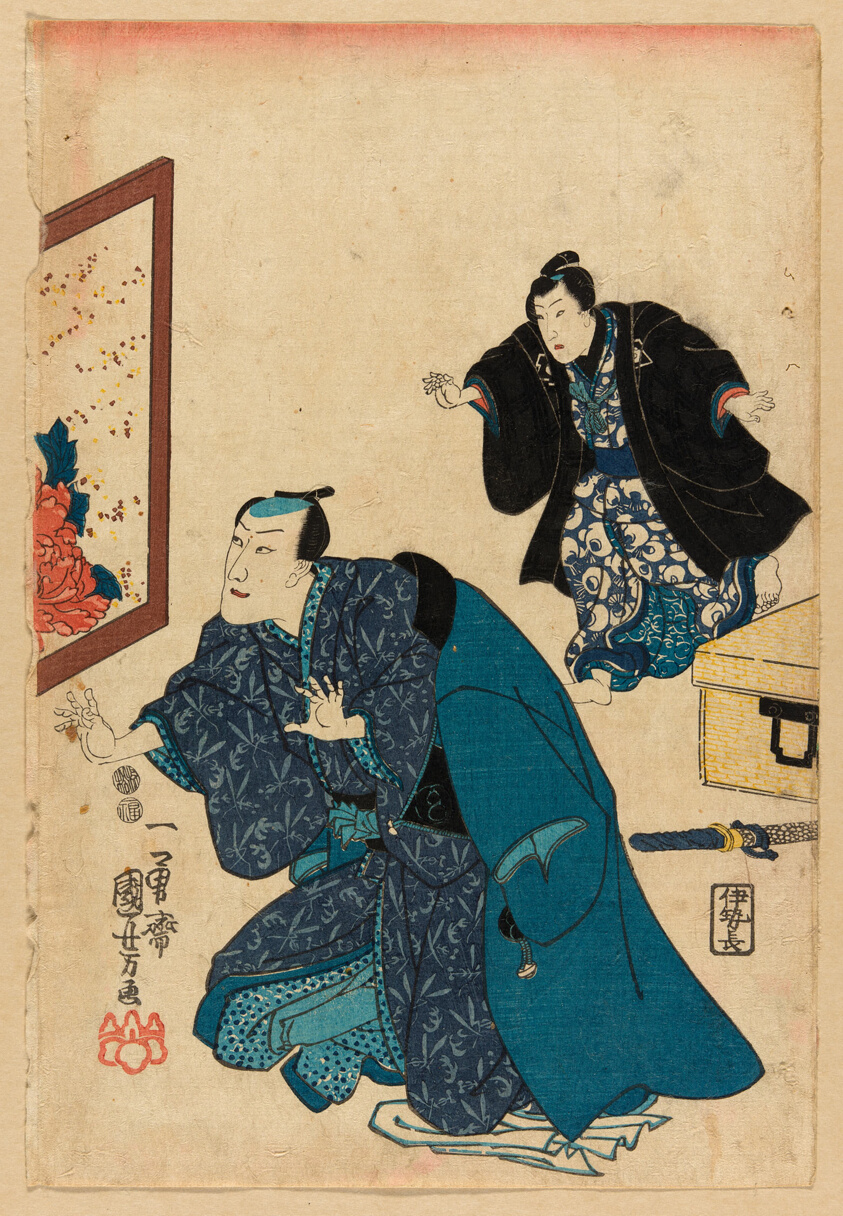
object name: Print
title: Ichikawa Danjuro VII before a screen decorated with peonies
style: Japanese (culture or style)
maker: Utagawa Kuniyoshi (Japanese, 1797-1861)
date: c. 1847/52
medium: Color woodblock print; two sheets from oban triptych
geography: Japan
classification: print; asian art